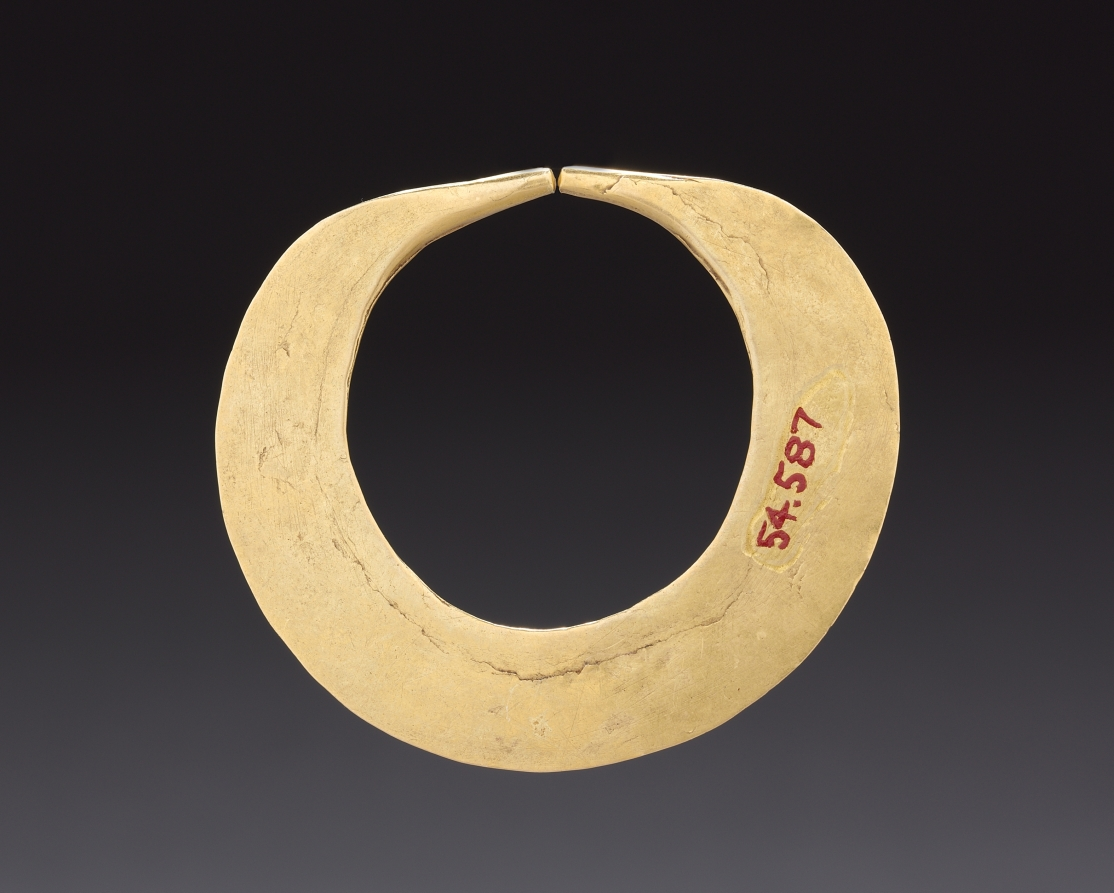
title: Nose Ornament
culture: West-central Colombia, Quimbaya style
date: c. 400–1000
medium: hammered gold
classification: Jewelry